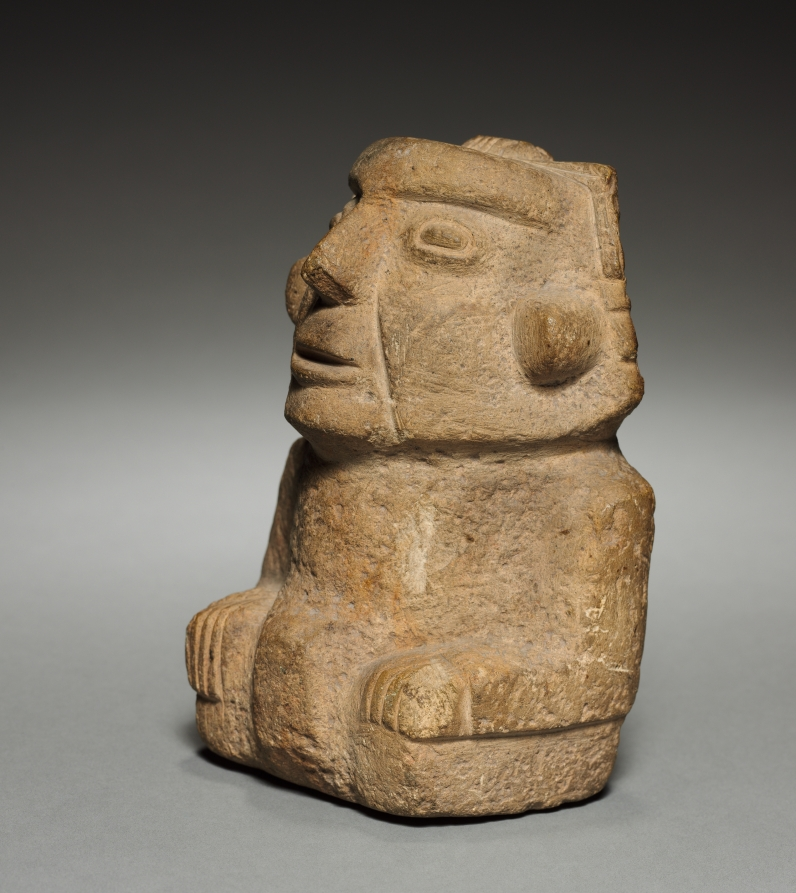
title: Seated Figure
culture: Pre-Columbian style, 20th century (?)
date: 20th Century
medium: tan stone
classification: Sculpture